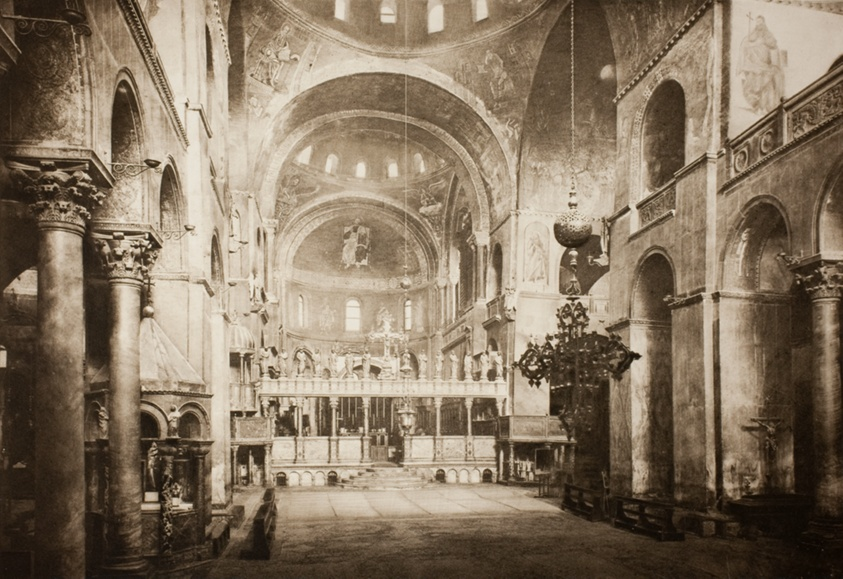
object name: Photograph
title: Untitled (II 57)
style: 19th century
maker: edited by Ferdinando Ongania; Italian, 1842–1911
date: c. 1890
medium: Photogravure, No. II 57 from the portfolio "Calli, Canali e Isole della Laguna"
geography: Italy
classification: photograph; photography